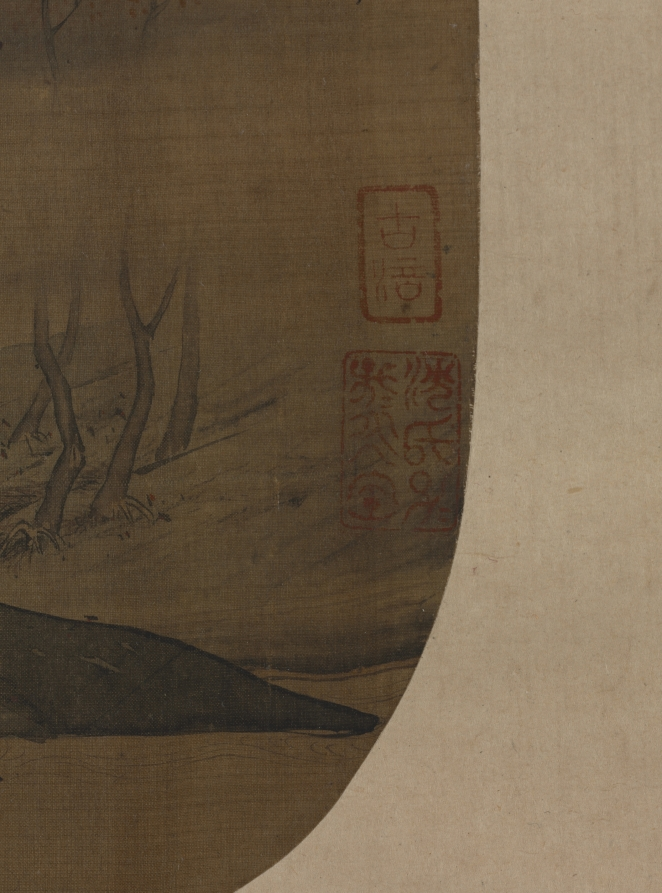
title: Buffalo and Boy in Autumnal Landscape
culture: China, Southern Song dynasty (1127-1279)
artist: Yan Ciping (Chinese, active 1164–1187)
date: 1127–1279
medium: album leaf; ink and light color on silk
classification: Painting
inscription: 5 seals: 3 unidentified; 2 indecipherable.